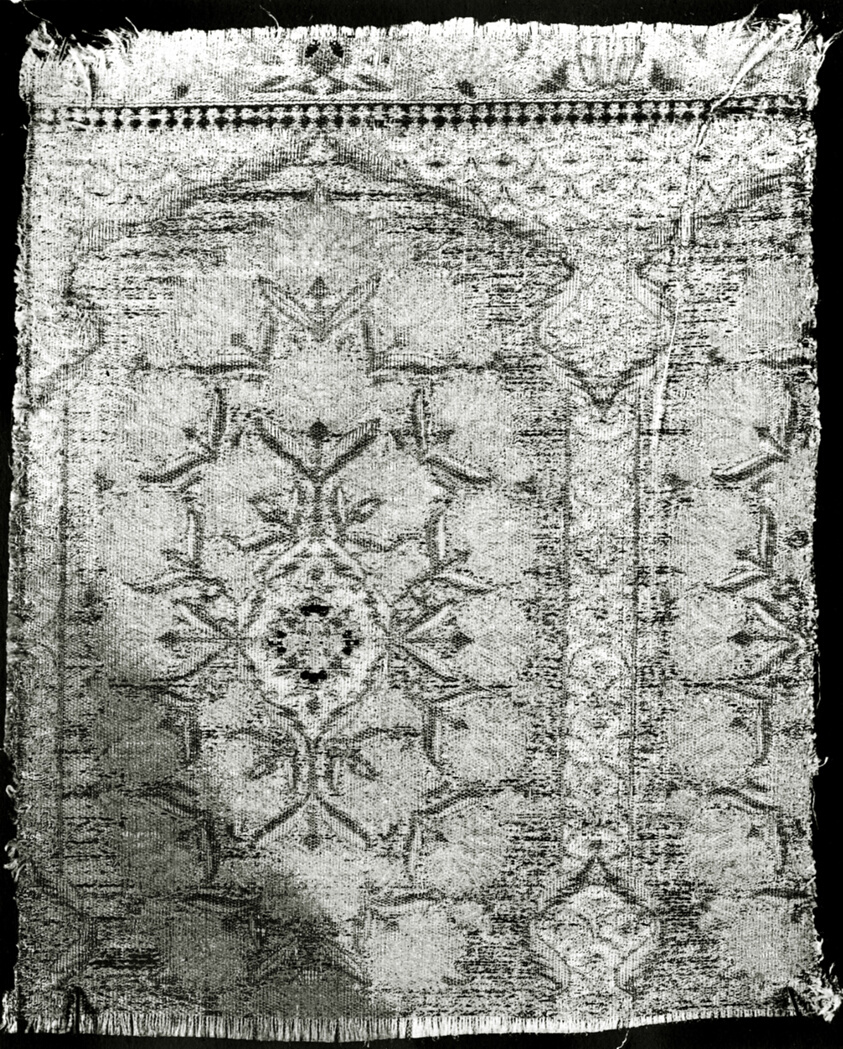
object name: Textile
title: Fragment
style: kashan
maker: Persia, Kashan, Iran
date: 18th century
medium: Brocaded plain compound cloth, silk, gold wound on yellow silk core, silver wound on white silk core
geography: Iran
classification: textile; weaving